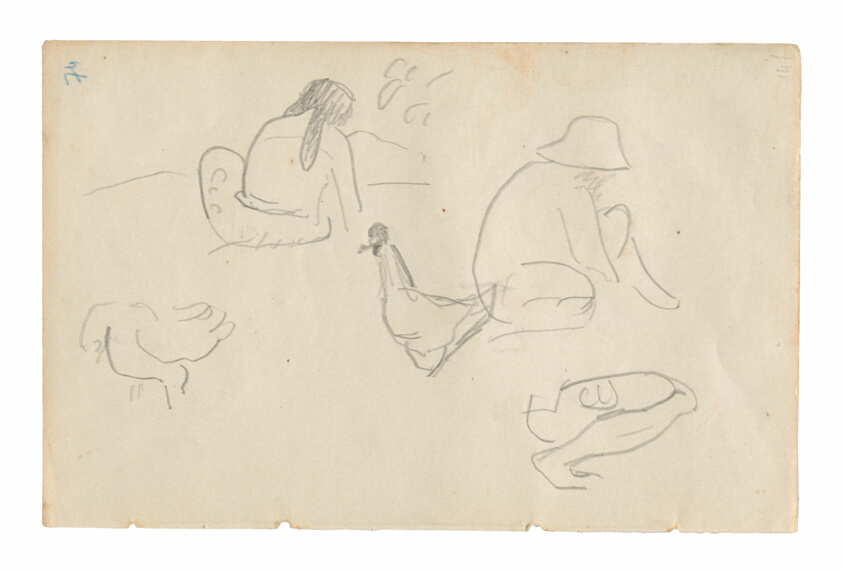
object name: Drawing and Watercolor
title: Sketches of Seated Figures and Chickens (recto), Nude Female Torso (related to the painting Te a no areois [The Seed of the Areoi]) (verso), from the Carnet de Tahiti (Tahitian sketchbook)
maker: Paul Gauguin (French, 1848-1903)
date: 1891/93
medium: Graphite (recto); graphite with traces of green watercolor offset (verso); on cream wove paper (removed from a sketchbook)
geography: France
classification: graphite; drawings (visual works); prints and drawing